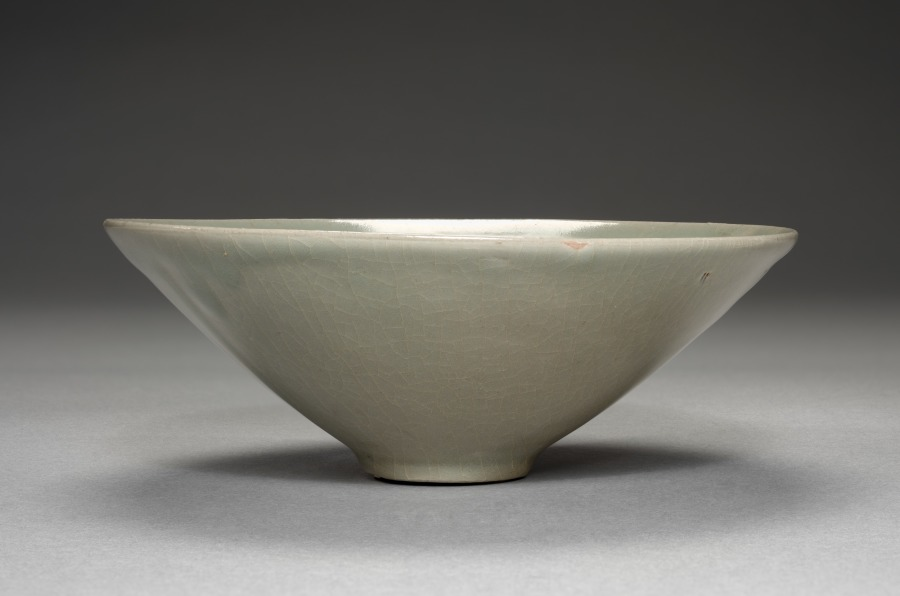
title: Bowl with Cloud Design in Relief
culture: Korea, Goryeo dynasty (918–1392)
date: 1100s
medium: glazed porcelain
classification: Ceramic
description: As early as the 600s, the practice of drinking tea and wine became an important part of elite leisure culture in Korea. A wide bowl like this example was especially suitable for drinking powdered tea shaved from a compressed tea cake, the most commonly enjoyed type during the Goryeo period. The pale bluish green glaze indicates that this tea bowl was created in the 12th century, the time when the production of celadon reached its technical peak.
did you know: Kangjin and Buan kilns in Jeolla province were the two major production centers for celadon wares during the Goryeo period (918–1392).